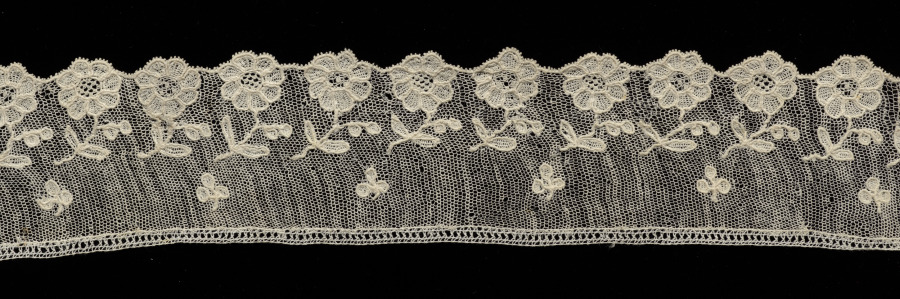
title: Lace Edging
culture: Italy, Burano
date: 1760–99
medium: Linen: needle lace (Burano Point)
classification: Lace